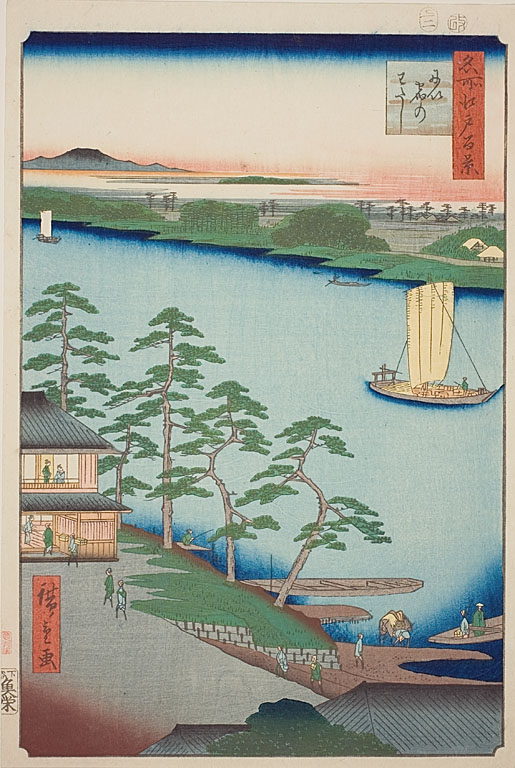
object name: Print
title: Niijuku Ferry (Niijuku no watashi), No.93 from the series "One Hundred Famous Views of Edo (Meisho Edo hyakkei)"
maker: Utagawa Hiroshige (Japanese, 1797-1858)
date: 1857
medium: Color woodblock print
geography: Japan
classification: woodblock print; print; asian art